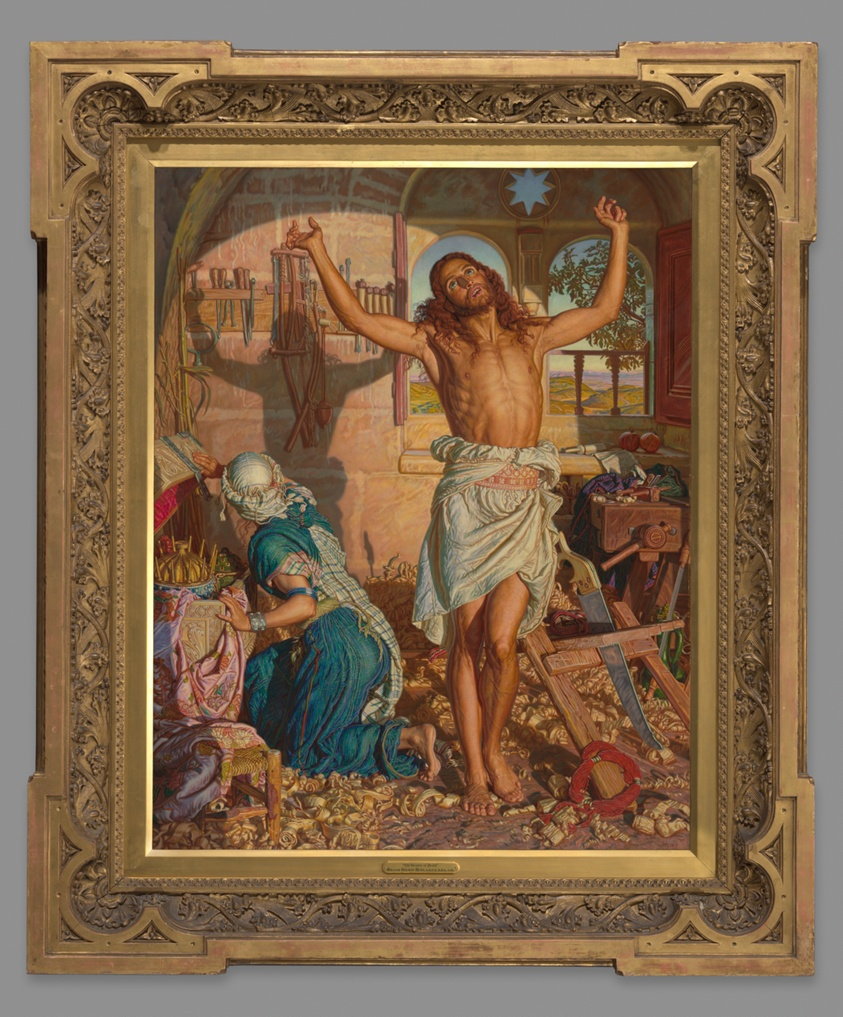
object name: Painting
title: The Shadow of Death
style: 19th century, Pre-Raphaelite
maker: William Holman Hunt (English, 1827-1910)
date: 1873-74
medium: Oil on panel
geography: England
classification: oil on panel; european painting; paint; painting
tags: Christian subjects, religious figures, Christianity, religious, religion